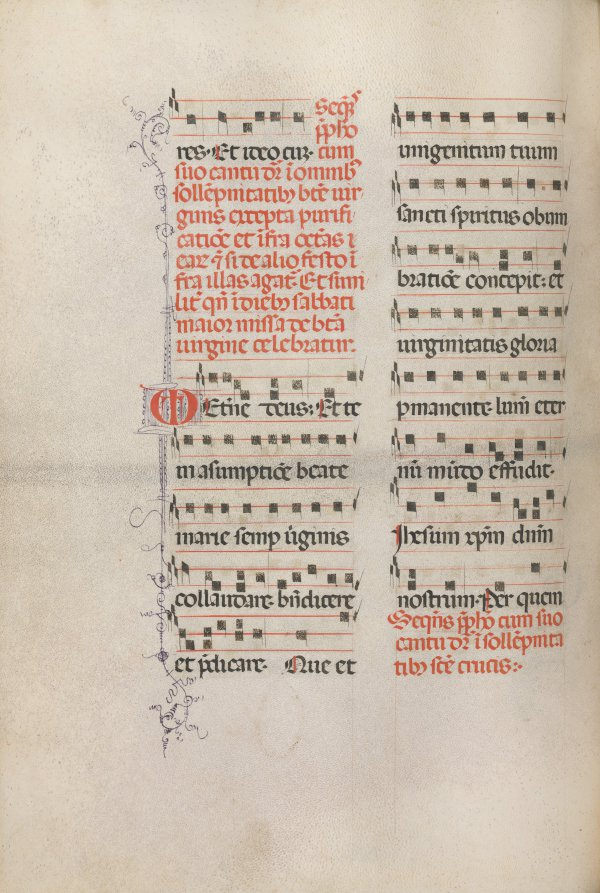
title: Missale: Fol. 181v: Music for various ordinary prayers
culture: Italy, Perugia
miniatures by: Bartolommeo Caporali (Italian, c. 1420–1503)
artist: assisted by Giapeco Caporali (Italian, d. 1478)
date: 1469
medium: ink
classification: Bound Volume